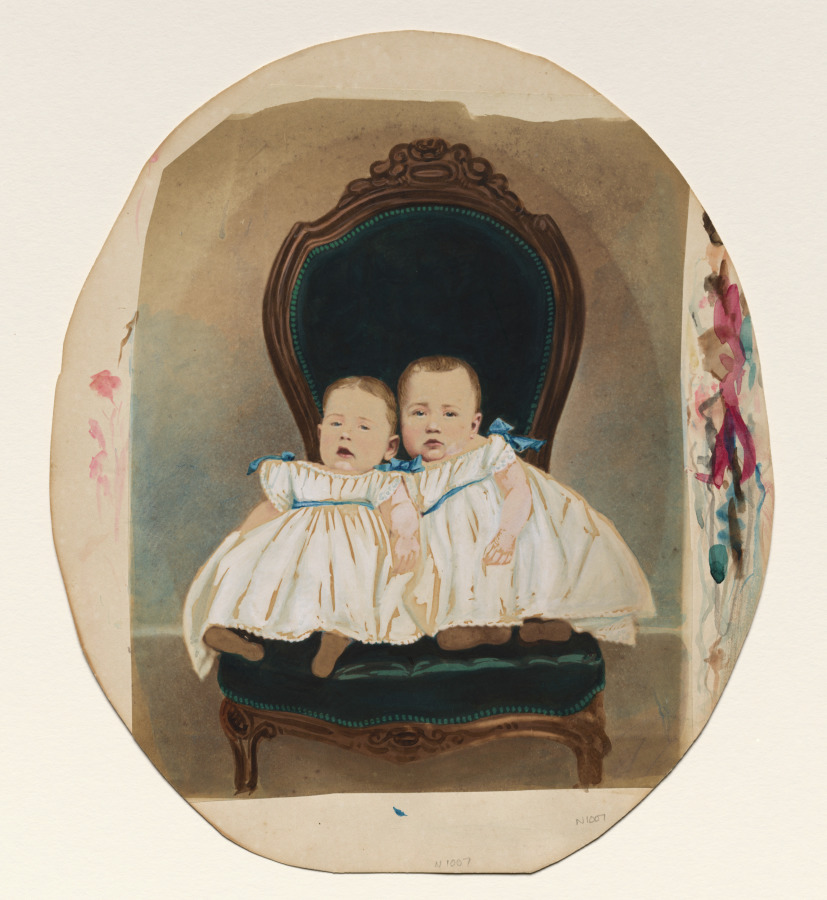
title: Twin Babies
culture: America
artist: Davis Brothers (American)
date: c. 1870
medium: salted paper print, hand-colored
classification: Photograph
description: Color photography was not widely available until the 20th century, but 19th-century photographs could be embellished with hand-applied paints or dyes for an extra charge. Hand coloring, often done by women, usually was limited to adding dabs of pink on lips and cheeks or gold on jewelry, but sometimes, as here, the entire surface would be covered to emulate a painting. The edges of this mount are covered with trial dabs of watercolor that would have been hidden by the mat. Once portraits leave the context of the family, the identities of the sitters are most often lost, as is the case for these twins. Since the Davis Brothers’ studio was in Portsmouth, New Hampshire, around this time, one can assume the twins lived there.